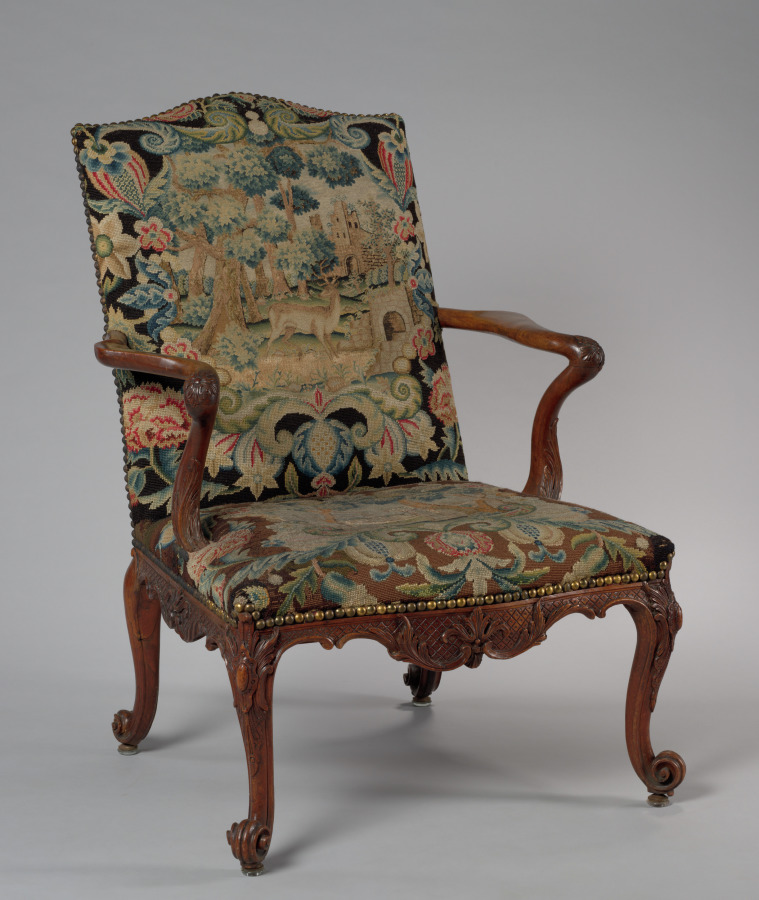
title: Armchair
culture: England, 18th century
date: 1760–1765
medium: mahogany upholstered in needlework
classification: Furniture and woodwork